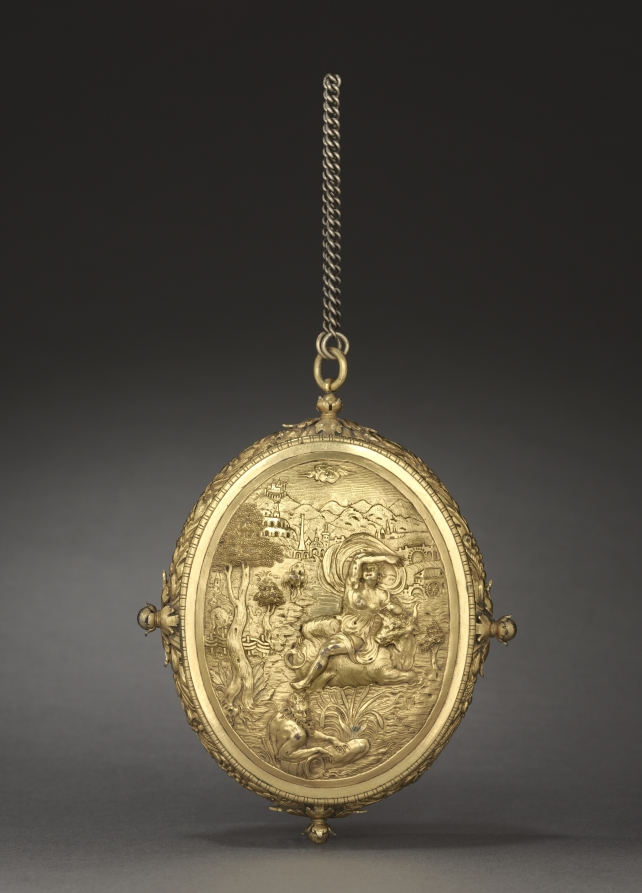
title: Locket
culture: Germany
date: c. 1565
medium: gilt copper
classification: Jewelry